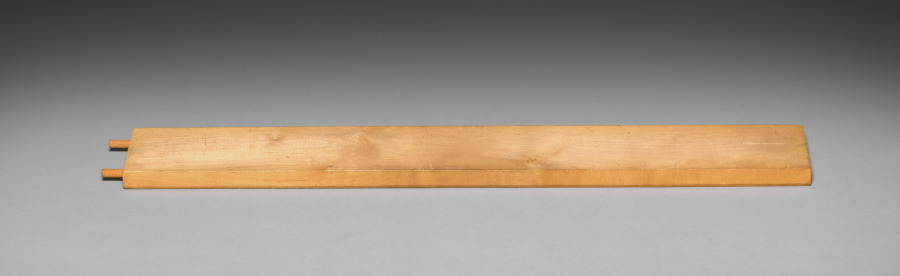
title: Train Track Section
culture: Denmark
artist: Boysen Toys (Danish)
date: 1900s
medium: wood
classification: Wood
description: Credit line: John D. Rockefeller General Education Board Grant II